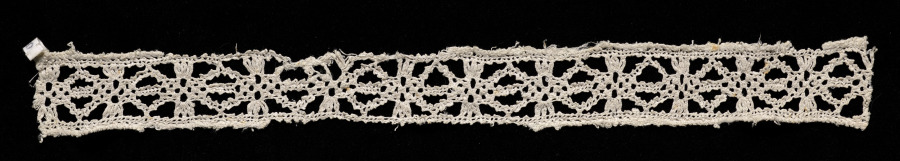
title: Lace Insertion (with selvage)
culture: Italy, Venice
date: 1540–60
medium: Bobbin lace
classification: Lace